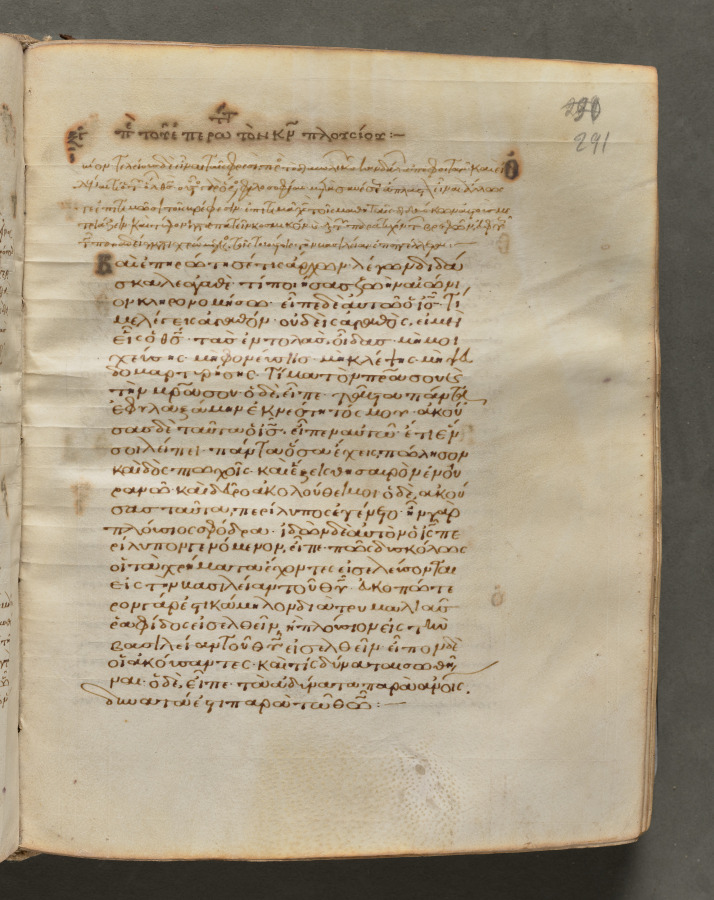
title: Text, folio 291 (recto), from a Gospel Book with Commentaries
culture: Byzantium, Constantinople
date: c. 1000–1100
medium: ink, tempera, and gold on vellum; leather binding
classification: Bound Volume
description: Each of the four gospels in this book opens on a page with brilliantly illuminated borders depicting the author of the text as well as birds—principally peacocks, symbols of the immortality of the soul—and fountains, representing the fountain of life and the salvation of the soul. This volume consists of 428 leaves with texts in Greek. Its level of sophistication suggests that it was probably written and decorated in a monastery in Constantinople.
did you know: Gospel books were carried in procession through Byzantine churches.